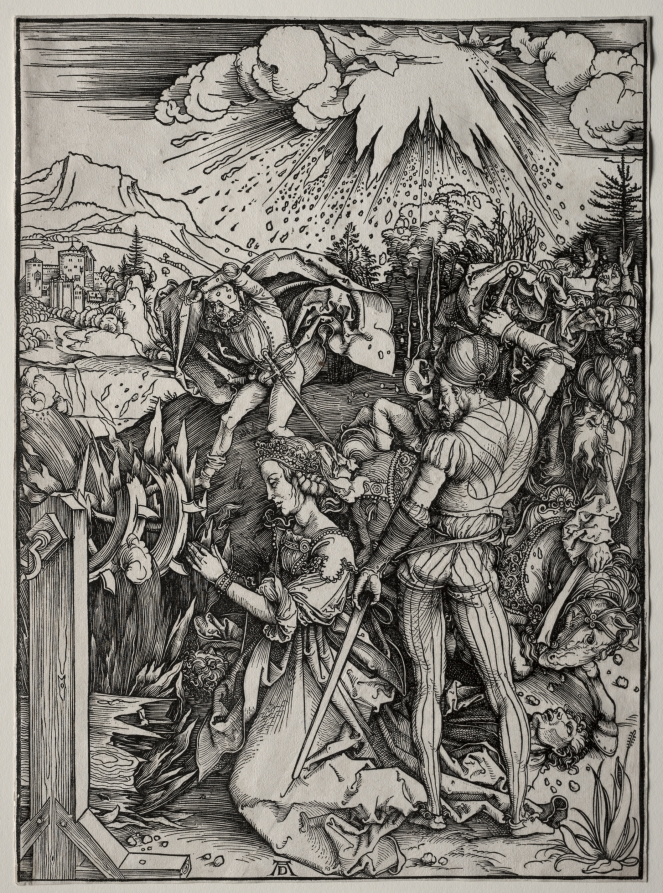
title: The Martyrdom of Saint Catherine of Alexandria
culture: Germany, late 15th-early 16th Century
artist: Albrecht Dürer (German, 1471–1528)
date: c. 1497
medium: woodcut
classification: Print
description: Saint Catherine was among the most popular virgin martyrs during this period and was particularly venerated in Dürer’s hometown of Nuremberg for her intermediary role between the faithful and God. A princess from Alexandria, Catherine was condemned to die on spiked wheels by the Roman emperor Maxentius because of her Christian faith. In answer to her prayers, God destroyed the wheels with such force that 4,000 pagans were killed. Afterward, Catherine was willingly decapitated. Dürer’s focus on Catherine’s peaceful acceptance in the midst of destruction conveys the power she derived from her chastity and unwavering faith, providing an excellent example for ordinary women to follow.